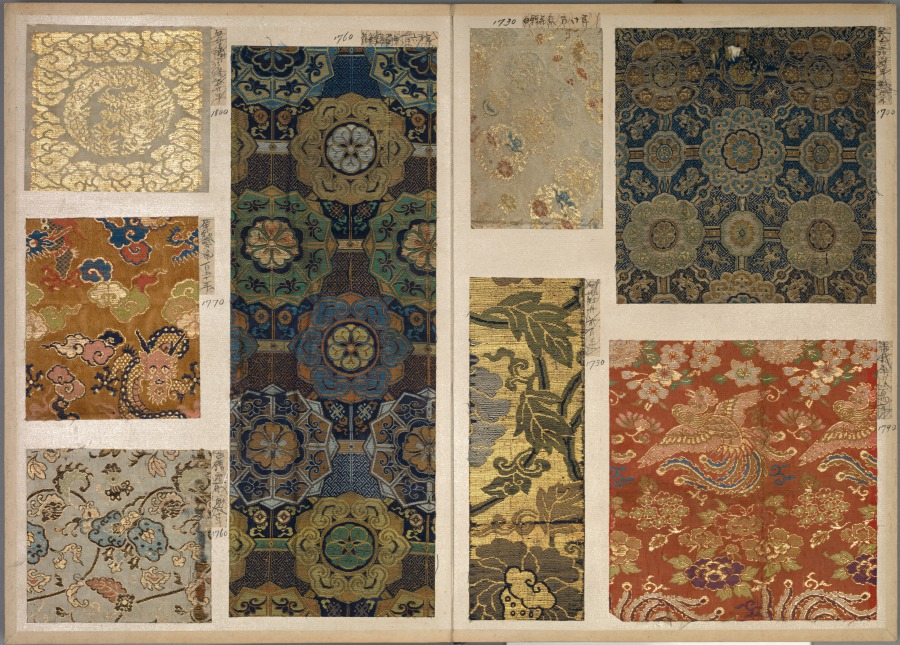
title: Album of Textile Samples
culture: Japan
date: 1790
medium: silk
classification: Textile